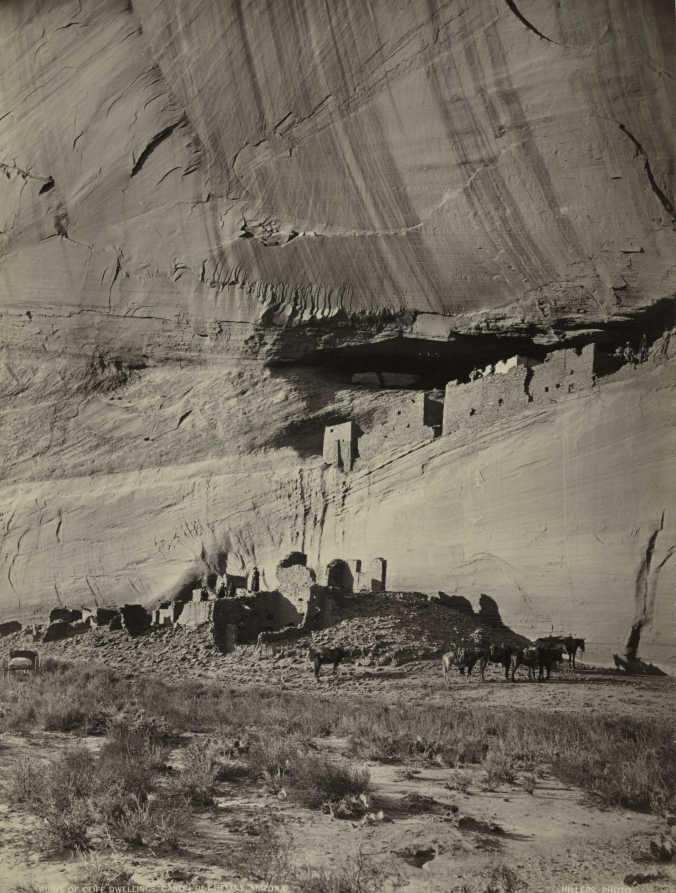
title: Ruins of Cliff Dwellings, Cañon de Chelly, Arizona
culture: America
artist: John K. Hillers (American, 1843–1925)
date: c. 1879–1881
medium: albumen print from wet collodion negative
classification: Photograph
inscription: Written in negative: "RUINS OF CLIFF DWELLINGS, CANON DE CHELLEY [sic], ARIZONA / HILLERS, PHOTO."